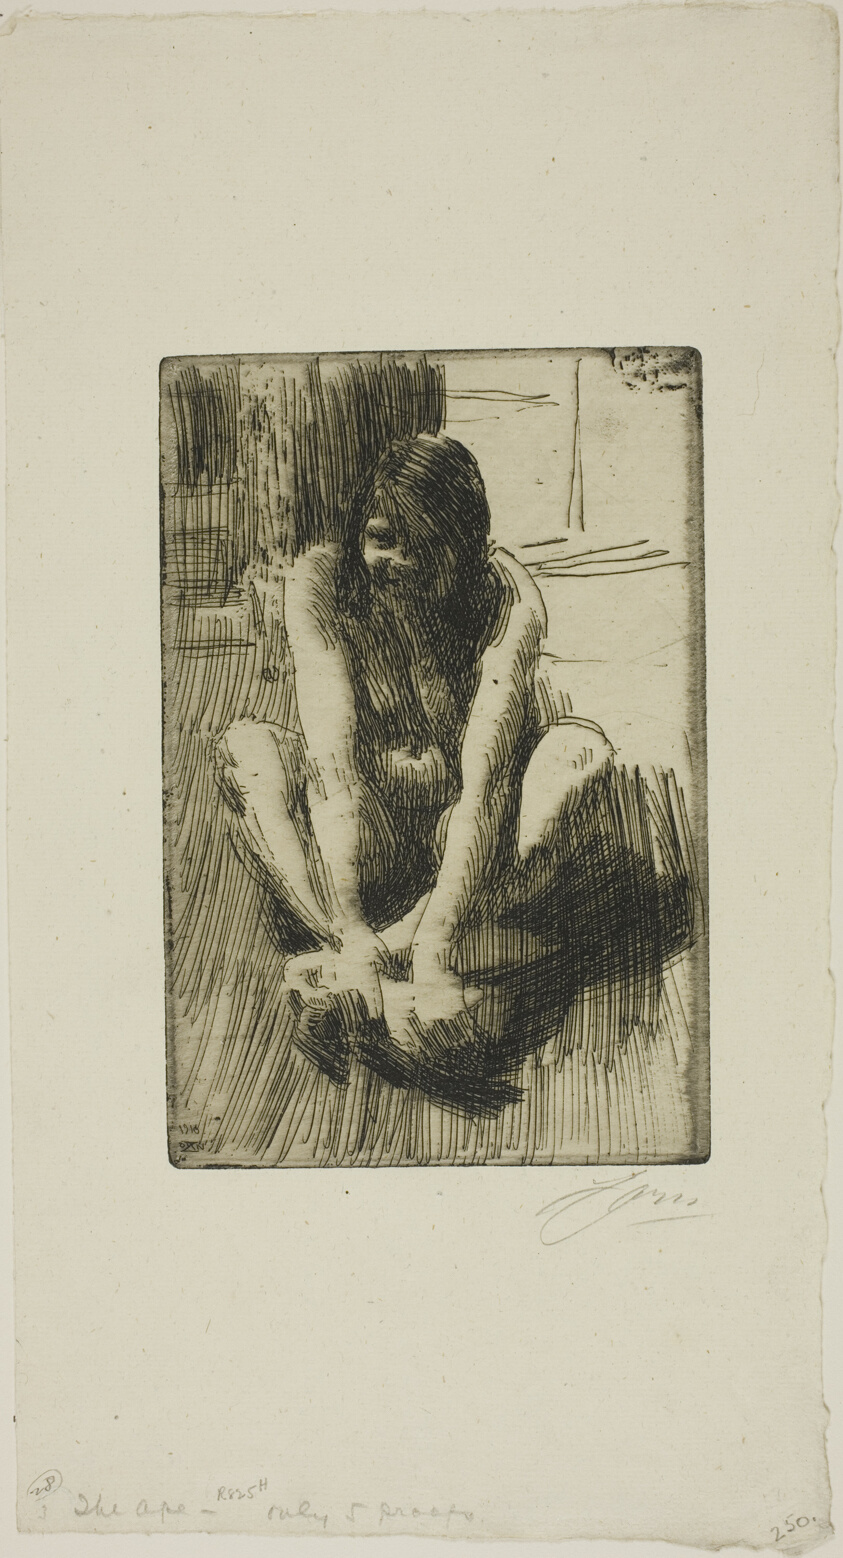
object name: Print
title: The Frog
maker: Anders Zorn (Swedish, 1860-1920)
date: 1910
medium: Etching on off-white laid paper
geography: Sweden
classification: etching; print; prints and drawing